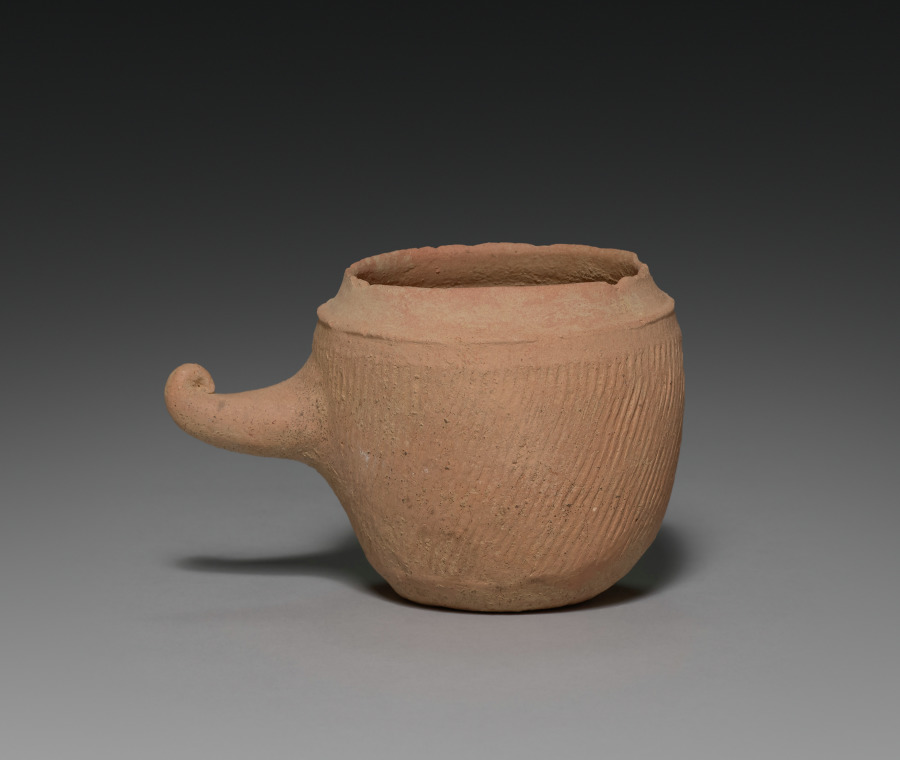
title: Covered Jar with Horn Handle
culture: Korea, Silla (57 BC-935) or Kaya (AD 42-562) period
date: 400s–500s CE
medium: red earthenware with impressed designs and applied red slip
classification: Ceramic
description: Early earthenware from the Three Kingdoms period (57 BCE–668 CE) became widely utilized as agriculture and religion grew to be essential elements in sustaining society and its systems. The clay jars of different sizes and shapes on display were made for the following purposes: some were used to store harvested grains and seeds, some, especially lidded ones such as this example, to preserve cremated remains, and some to serve offerings in rituals.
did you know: Closed kilns built on hillsides became widely used for producing this type of pottery vessel in Korea during the Three Kingdoms period.